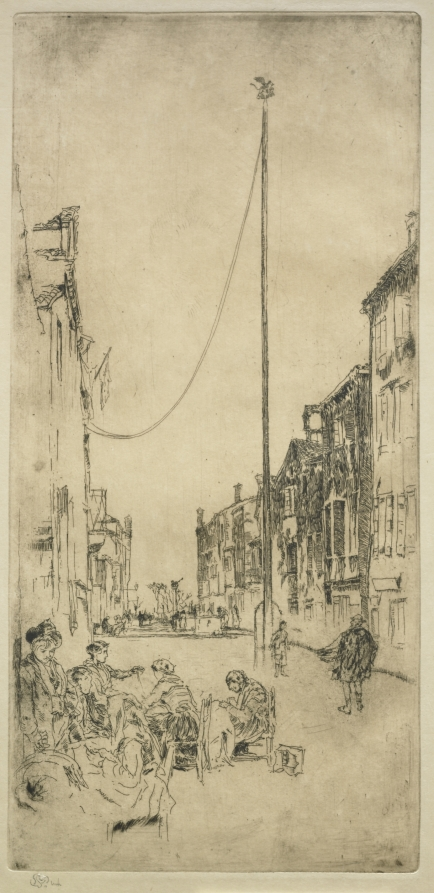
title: The Mast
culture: America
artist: James McNeill Whistler (American, 1834–1903)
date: 1879–80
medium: etching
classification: Print